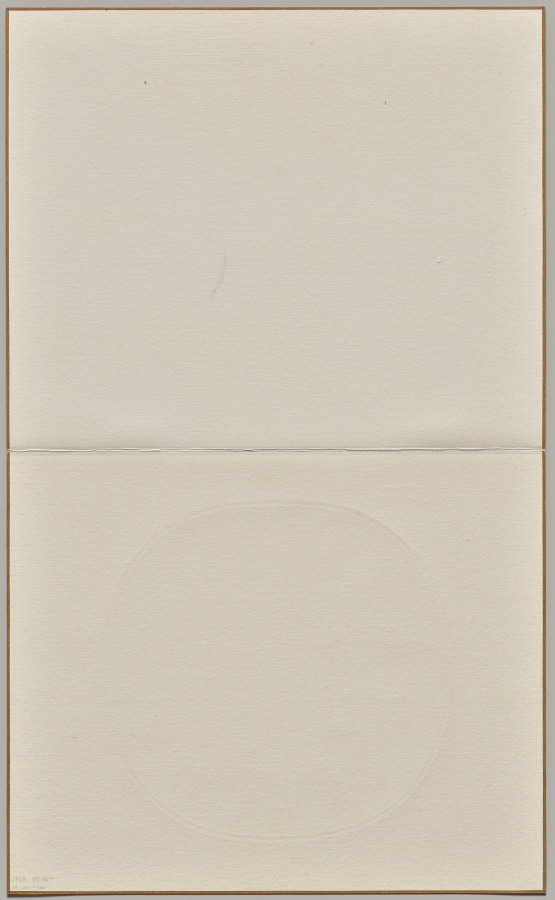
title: Birds on a Peach Branch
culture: China, Southern Song dynasty (1127–1279)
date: 1100s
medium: Album leaf; ink and light color on silk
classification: Painting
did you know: An insect is drawn to the scent of the ripe peaches. Is the bird going to catch it?